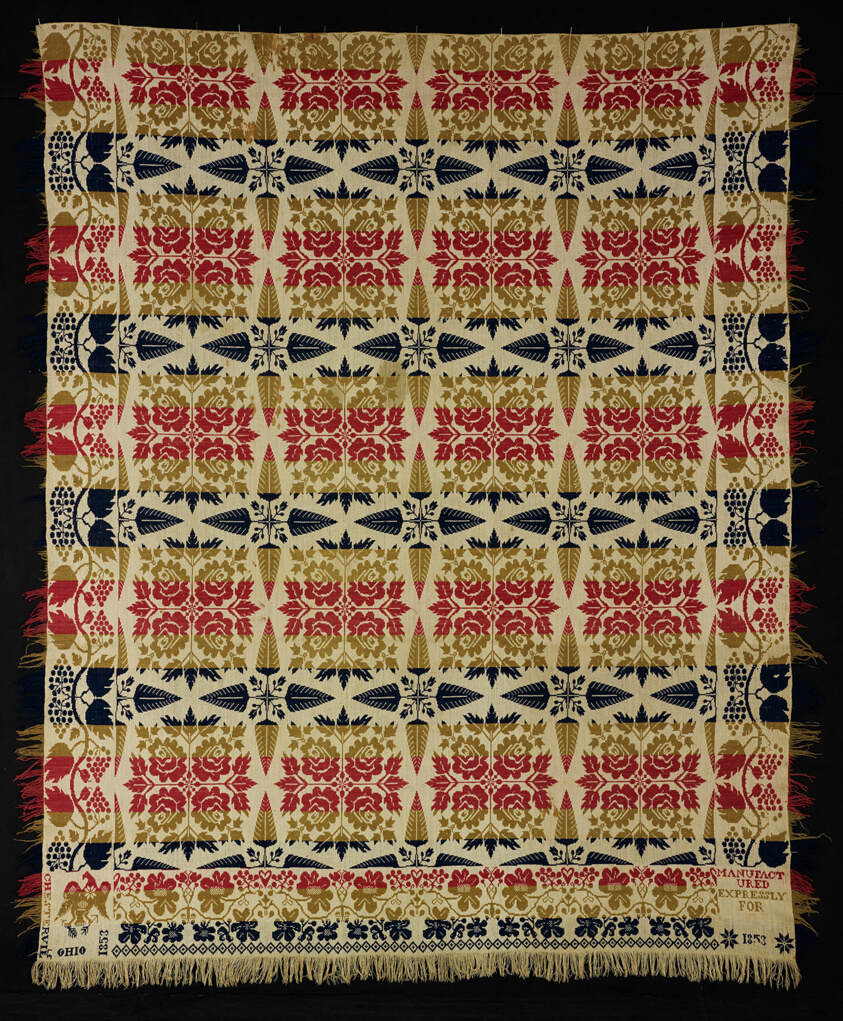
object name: Textile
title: Coverlet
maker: United States, Ohio, Chesterville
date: 1853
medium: Cotton and wool, plain weave with supplementary patterning wefts bound by main warps in plain interlacings with main warp and supplementary patterning weft fringe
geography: Ohio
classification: textile; coverlet; weaving - coverlet; weaving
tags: coverlet